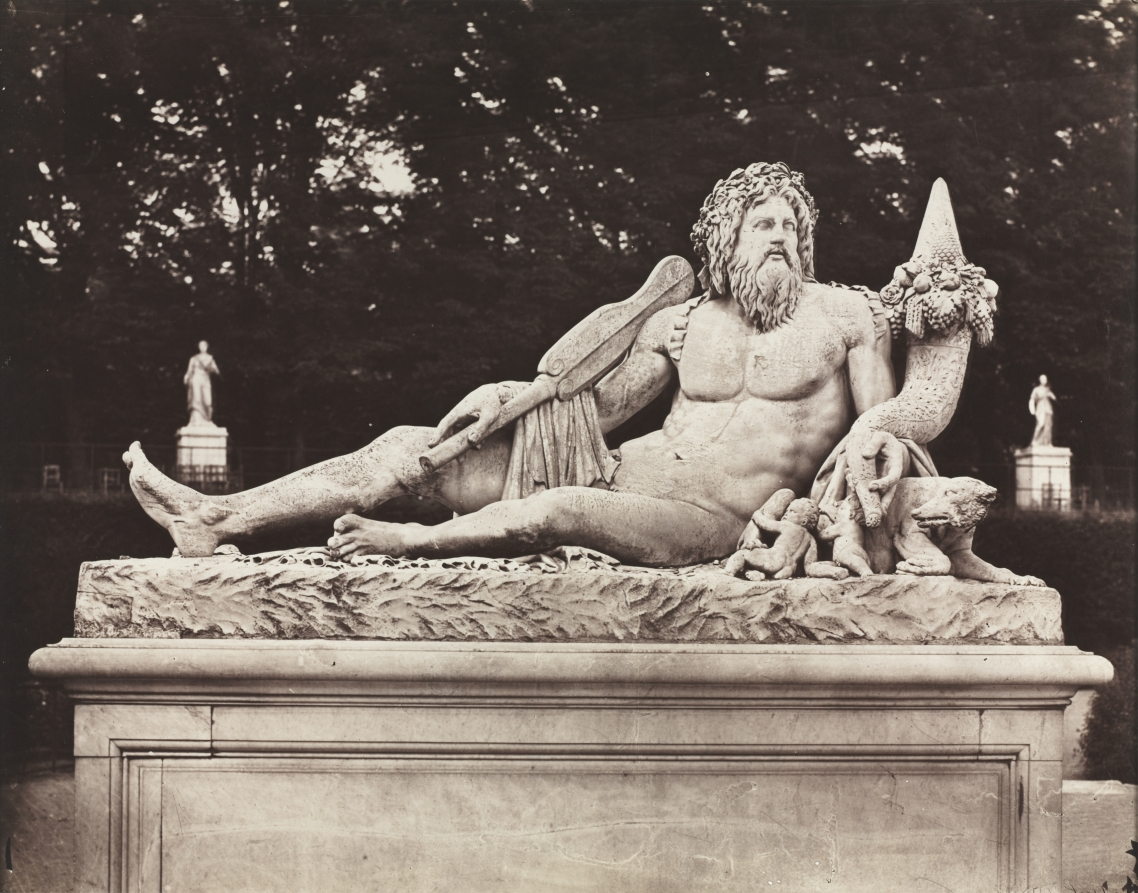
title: The Tiber, Tuileries Garden, Paris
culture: France, 19th century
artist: Charles Nègre (French, 1820–1880)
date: 1859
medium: albumen print from wet collodion negative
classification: Photograph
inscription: Written in pencil on verso: " 4/21/81 LM FH80.655"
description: The gardens of the Tuileries palace became a public park after the 1789 French Revolution. In 1859, Charles Nègre received government support to produce 50 photographs of their statuary. He never completed the project and made only a small number of unique prints, of which this is one. This stone sculpture, created in the late 1700s, depicts a human personification of the god of the Tiber River. The waterway runs through Rome, which is symbolized by the she-wolf and twins. This is one of the garden’s four sculptures depicting water deities.